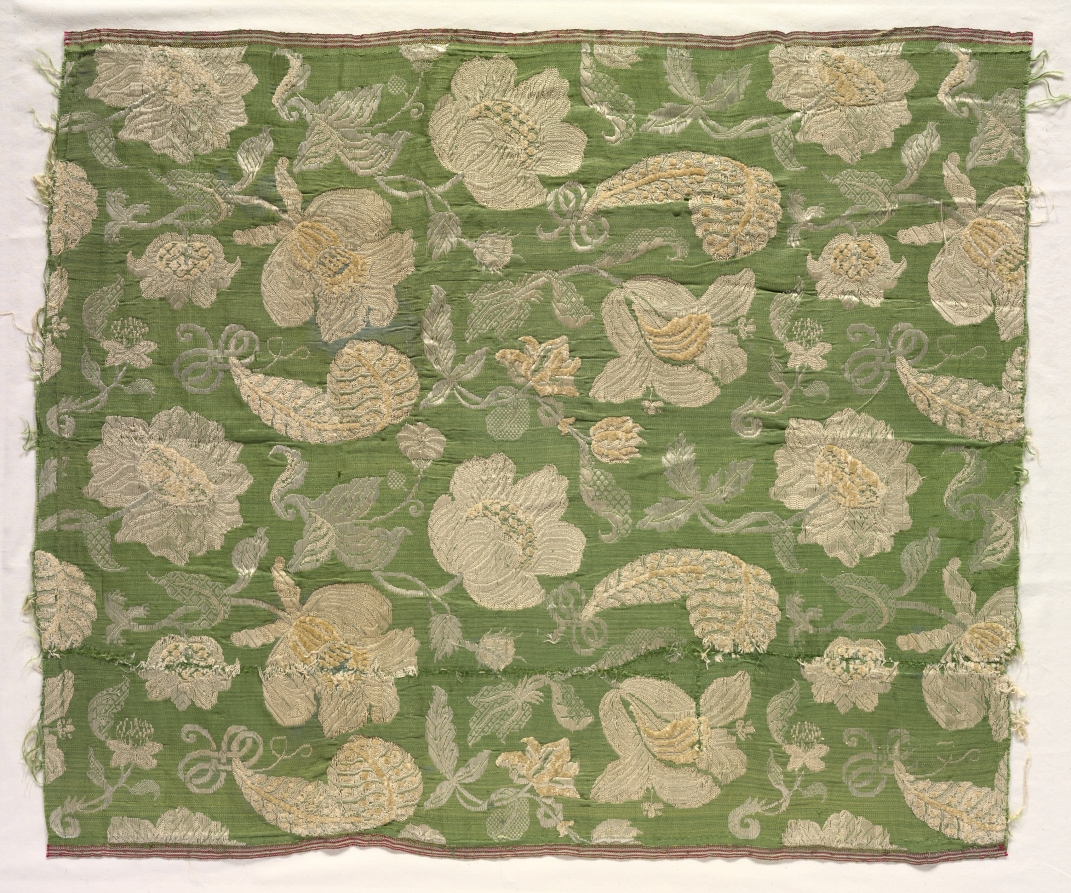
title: Fragment of Silk Textile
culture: Spain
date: 1700s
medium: plain cloth, brocaded; silk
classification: Textile